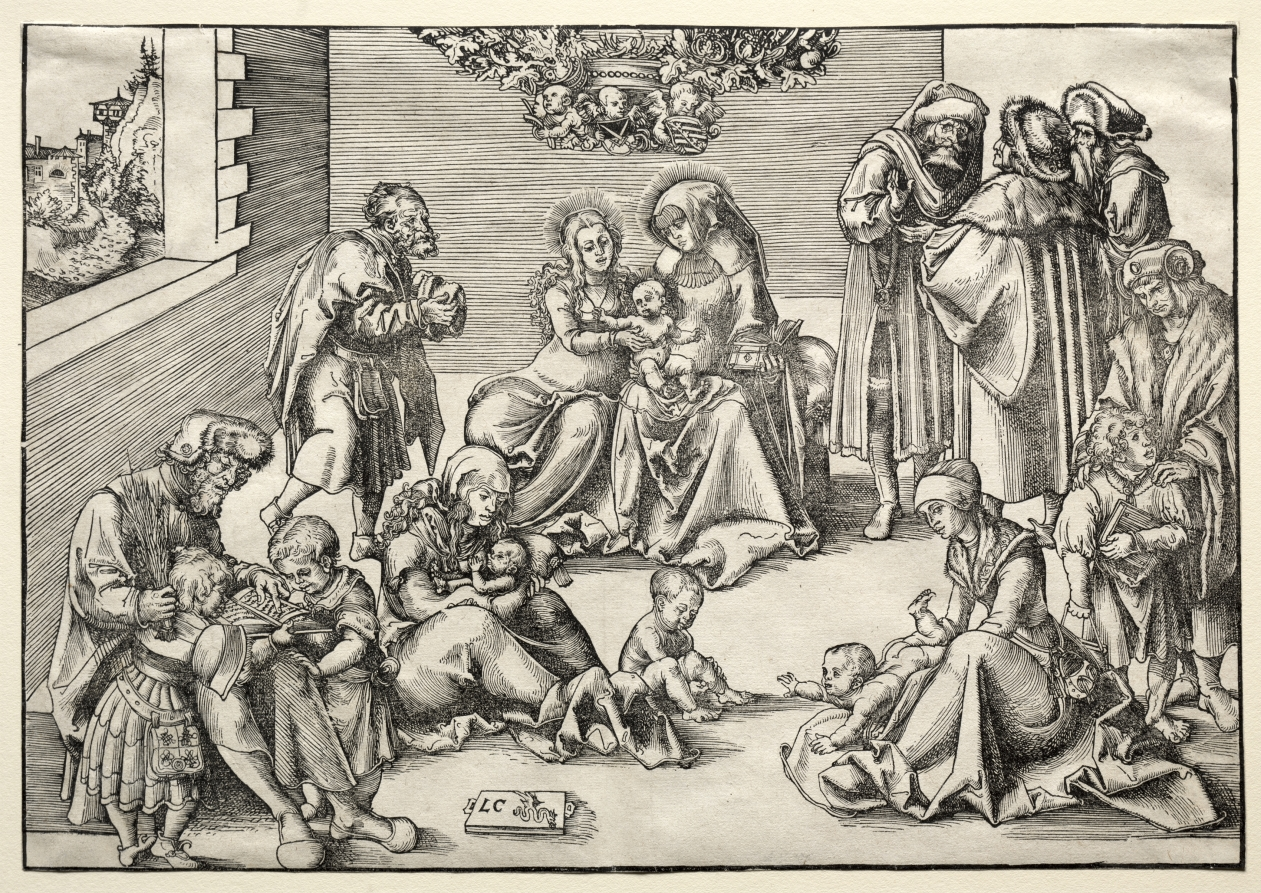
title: The Holy Family and Kindred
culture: Germany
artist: Lucas Cranach (German, 1472–1553)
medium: woodcut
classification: Print